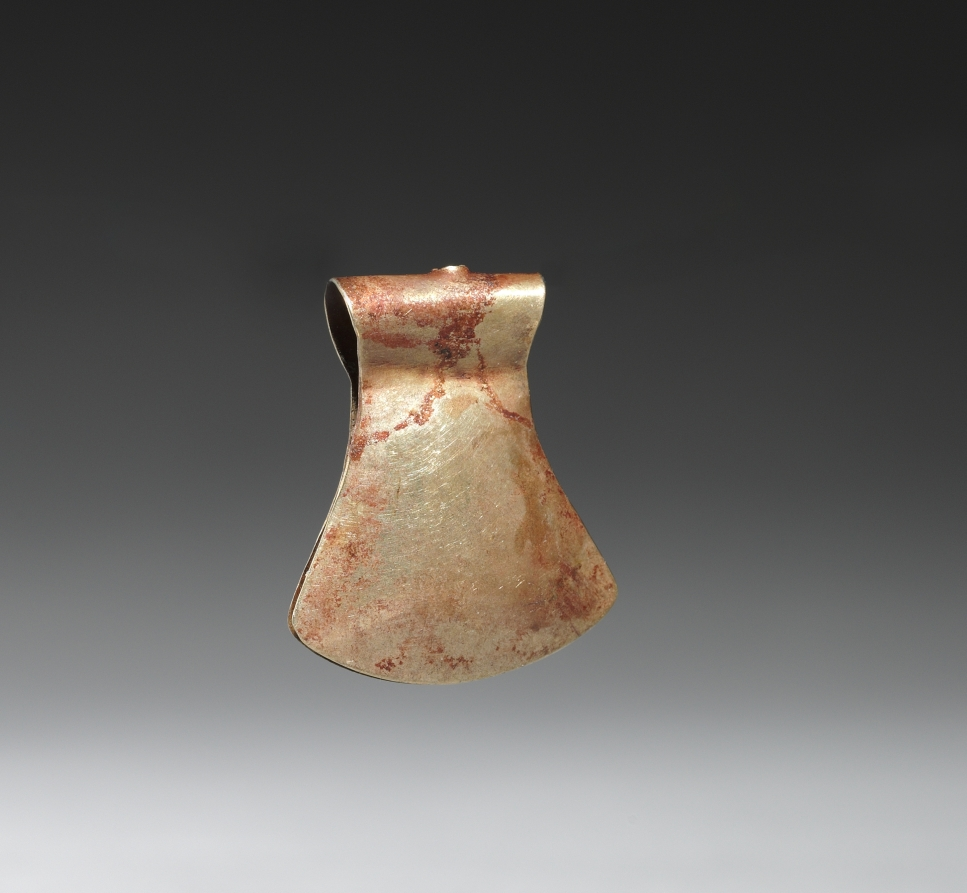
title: Tweezer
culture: Peru, North Highlands, Chavín de Huantar(?), Chavín style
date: c. 500–200 BCE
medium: hammered and cut gold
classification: Metalwork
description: There seems to be a link between Chavín religion and appearance of the Andes’ first large precious-metal objects, made using revolutionary new metallurgical processes. Chavín may have developed these technical innovations to express the inexpressible, the "wholly other" nature of its religion. In many areas, elite men and women wore the ornaments as emblems of their ties to this religion, and eventually were buried with them. These 16 objects, along with three others not in the museum’s collection, are said to have come as a group from Chavín itself.